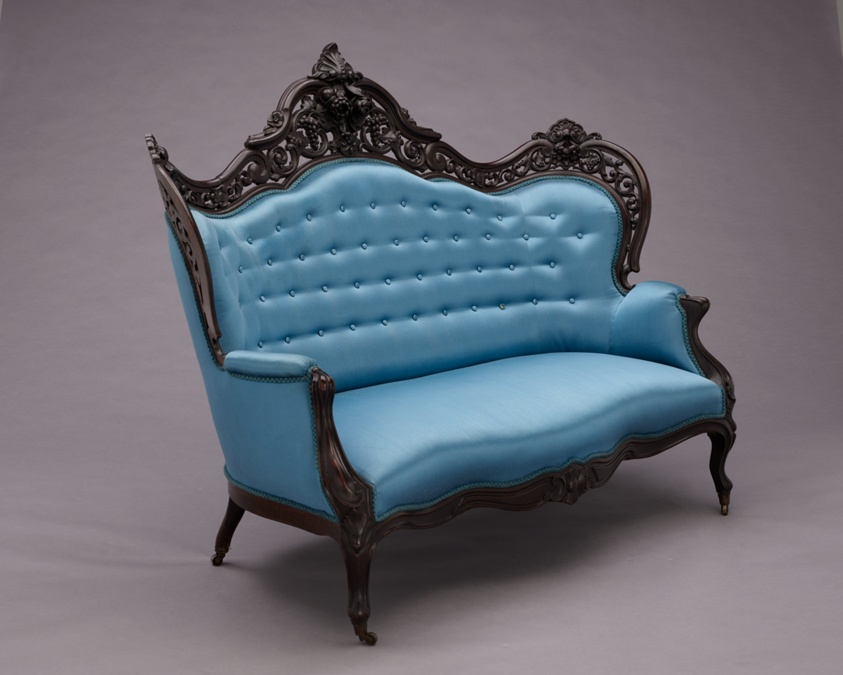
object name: Furniture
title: Sofa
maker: John and Joseph W. Meeks Company; American, active 1836–59; New York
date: 1856–65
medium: Rosewood and upholstery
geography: New York City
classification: seating; furniture; american decorative arts; american arts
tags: furniture